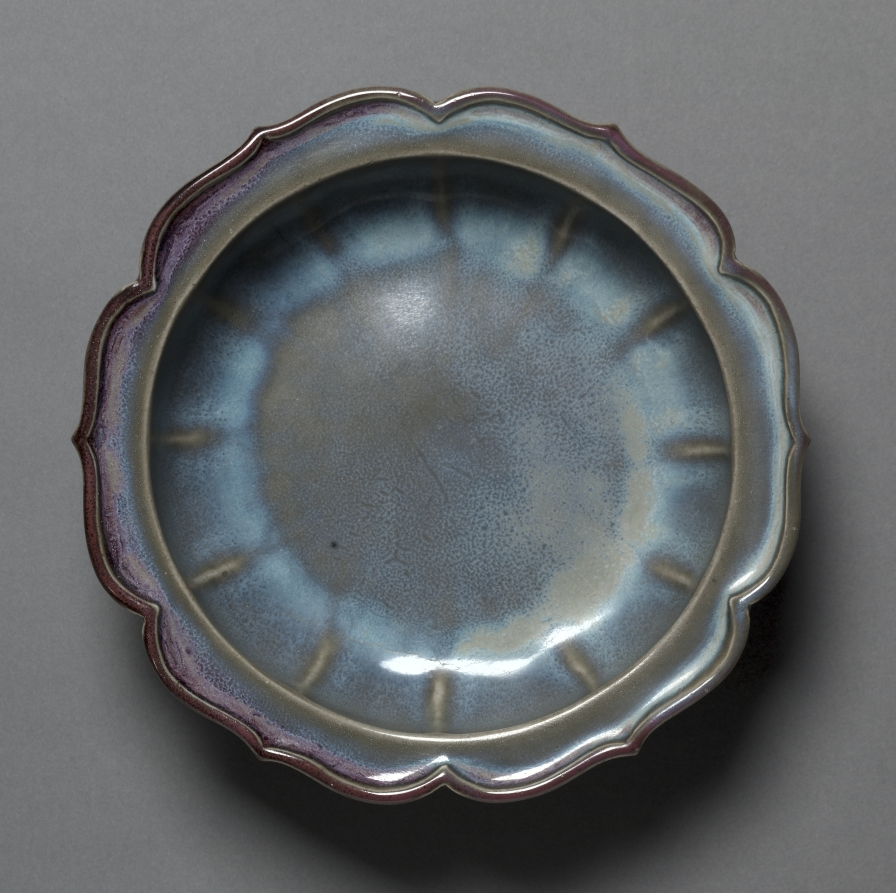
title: Bulb Bowl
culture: China, Henan Province, Yuxian, Juntai, Ming dynasty (1368–1644)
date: early 1400s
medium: porcelaneous stoneware, numbered Jun ware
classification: Ceramic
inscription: 二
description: Numbered Jun ware is inscribed with a number on its bottom—in this case number "two"—and is thought to have been made initially for the early Ming imperial court. The number indicates size, with "one" being the largest and "ten" being the smallest. Another characteristic is the "earthworm trail" left on the glaze surface, seen on the interior of this bulb bowl, where the opalescent blue glaze has cracked in several places during firing. The rich purplish tone on the exterior is the result of using copper pigment in the glaze.